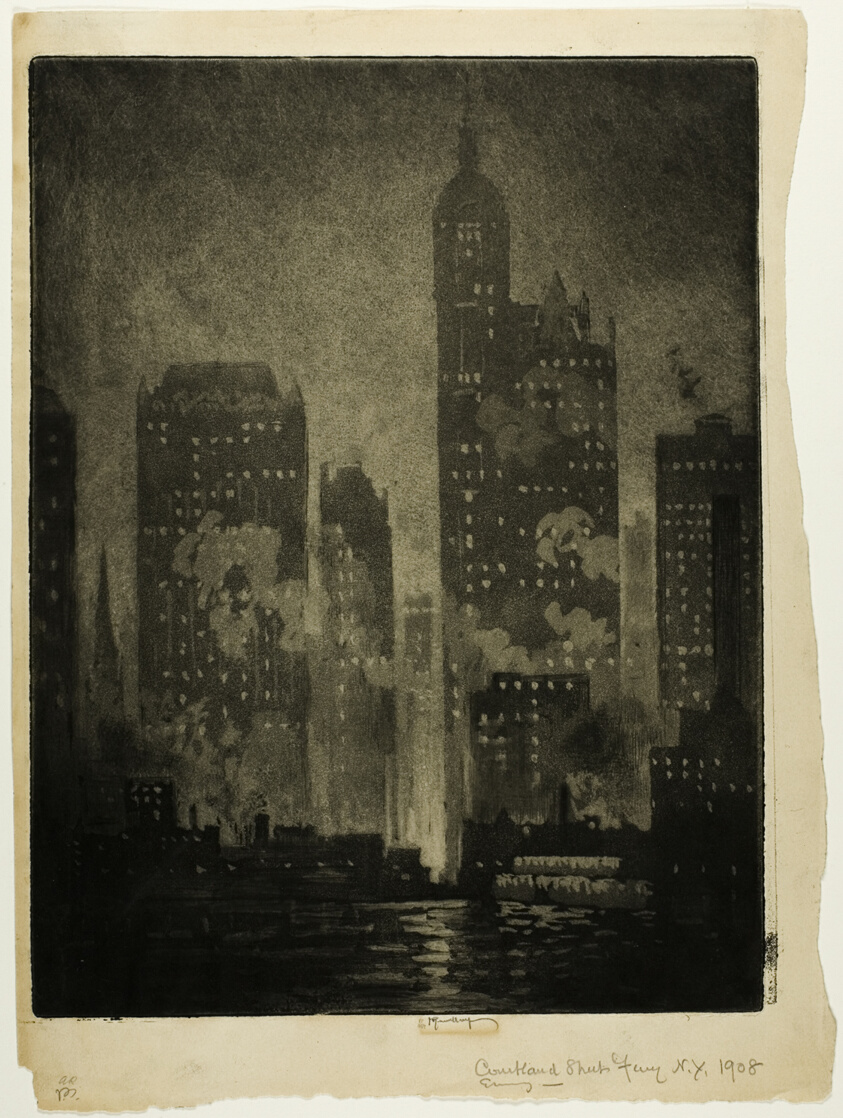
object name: Print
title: From Courtlandt Street Ferry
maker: Joseph Pennell (American, 1857-1926)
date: 1908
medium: Sandpaper mezzotint on ivory wove paper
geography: United States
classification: mezzotint; print; prints and drawing